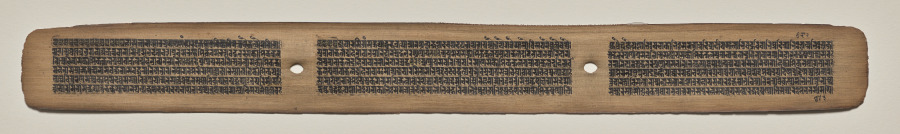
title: Text, Folio 25 (recto), from a Manuscript of the Perfection of Wisdom in Eight Thousand Lines (Ashtasahasrika Prajnaparamita-sutra)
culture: Eastern India, Bihar, Vikramashila Monastery. Painting: Nepal, Kathmandu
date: Sunday, September 14, 1119 (year 239 of the Newar Samvat in the month of Ashvina)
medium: gum tempera and ink on palm leaves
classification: Painting